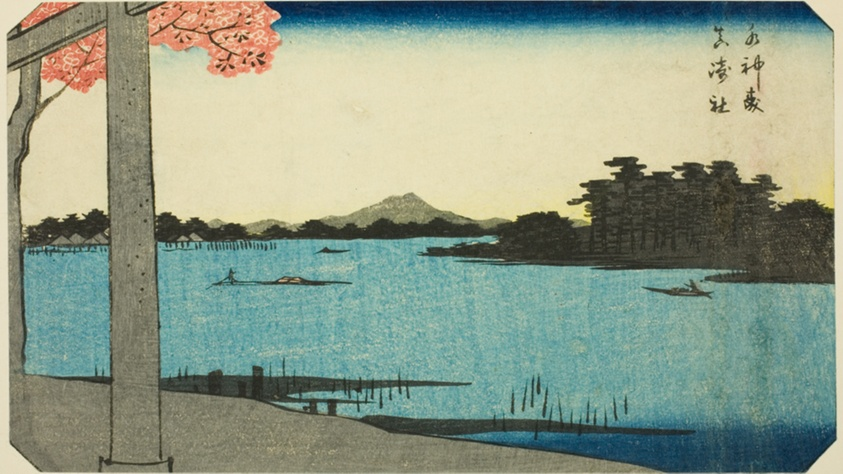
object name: Print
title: Suijin Woods and the Shrine at Massaki (Suijin no mori, Massaki yashiro), section of a sheet from the series "Cutout Pictures of Famous Places in Edo (Edo meisho harimaze zue)"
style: Japanese (culture or style)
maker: Utagawa Hiroshige 歌川 広重; Japanese, 1797-1858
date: 1857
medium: Color woodblock print; section of harimaze sheet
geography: Japan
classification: woodblock print; print; asian art